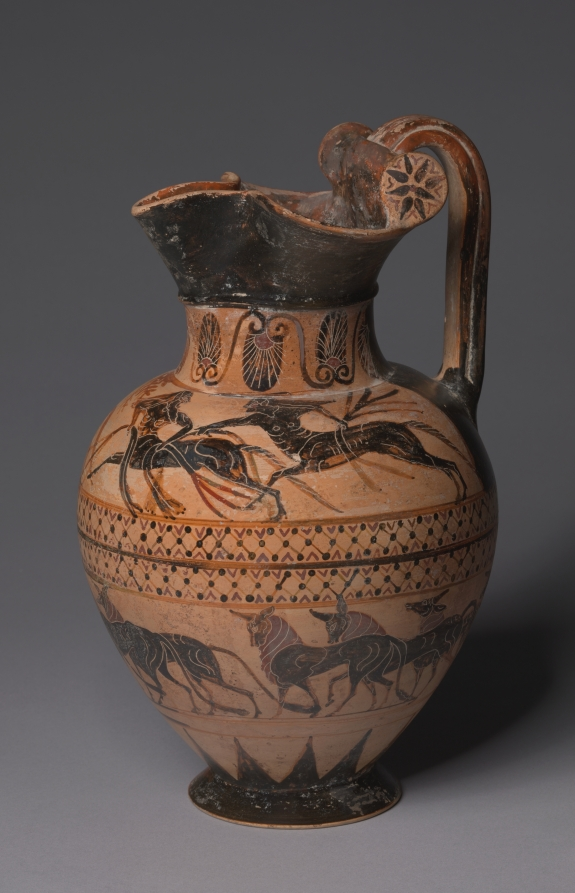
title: Black-Figure Oinochoe (Wine Jug): Hercle (Herakles) and Pholos; Cattle (of Geryon?)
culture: Etruscan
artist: attributed to Tityos Painter (Etruscan, active at Vulci c. 530–510 BCE)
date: c. 520 BCE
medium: ceramic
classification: Ceramic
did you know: This oinochoe or wine pitcher is a type of pottery made by the Etruscans or pre-Italic peoples.